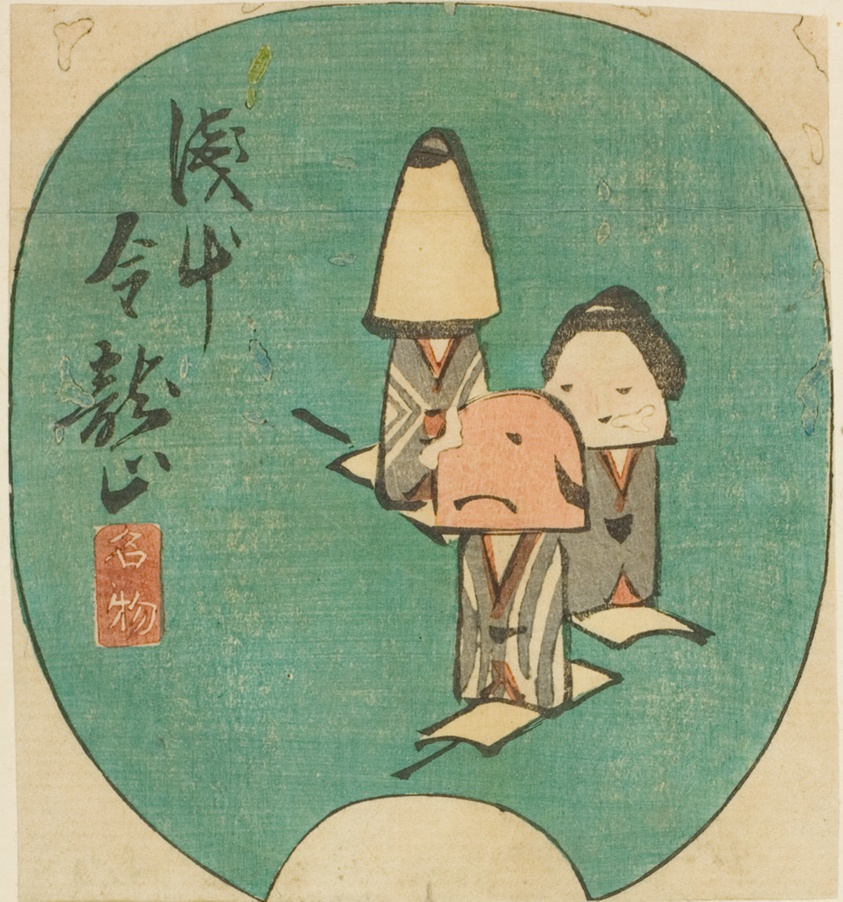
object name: Print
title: Famous Products of the Kinryuzan Temple at Asakusa (Asakausa Kinryuzan meibutsu), section of a sheet from the series "Cutouts of Famous Places in Edo (Harimaze Koto meisho)"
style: Japanese (culture or style)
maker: Utagawa Hiroshige 歌川 広重; Japanese, 1797-1858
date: 1852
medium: Color woodblock print; section of harimaze sheet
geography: Japan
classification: woodblock print; print; asian art